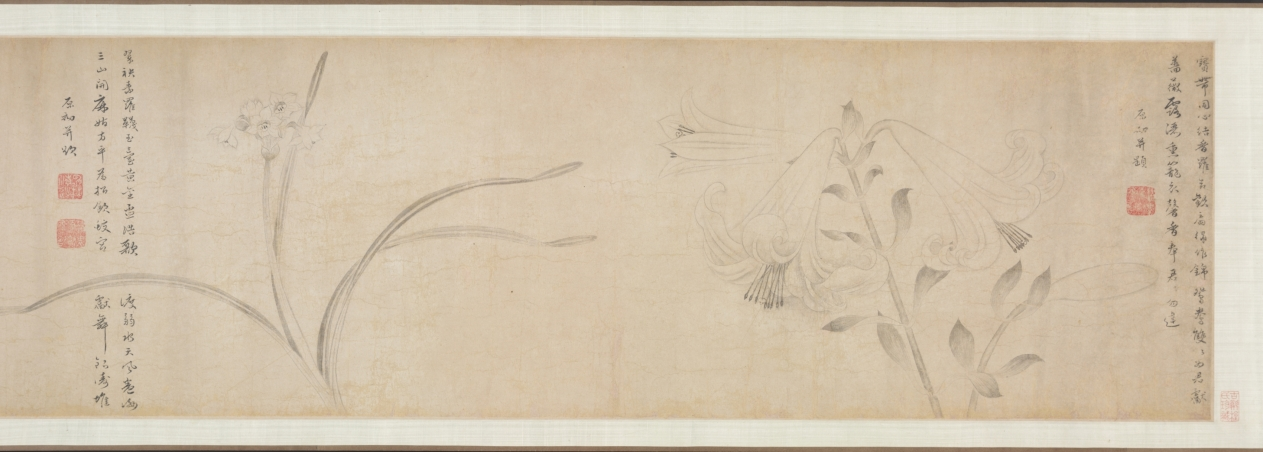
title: Ink Flowers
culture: China, Yuan dynasty (1271-1368)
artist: Zhao Zhong (Chinese, second half of the 1300s)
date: 1361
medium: Handscroll; ink on paper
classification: Painting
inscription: 寶帶同心結，香羅合歡扇。/ 繡作錦鴛鴦，雙雙為君獻。/ 薔薇露灑熏籠衣，馨香奉君君勿違。 原初并題。 [印] 趙衷原初畫記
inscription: 翠袂素羅韈，玉臺黃金盃。浩歌渡弱水。天風卷海三山開，麻姑方平為招飲，蛟宮獻舞銀濤堆。 原初并題。 [印] 雲林清趣、[印] 趙衷原初畫記。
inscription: 右用湯叔雅慶元中所寫墨花法作此卷，又效李長吉體賦詩以題之。詩與畫雖未工，要皆出於古人之餘，譬猶欲成方圓而必求其規矩之用也，識者毋誚焉！至正辛丑八月望日，東吳野人趙衷原初謹識。 [印] 趙原初、[印] 傳世清玩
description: Zhao Zhong's flowers, each paired with a poem, echo the fine-style colored flowers of the academic tradition, but instead he used only ink. Fine lines define the contours of each plant, as well as the veins within each petal and leaf. Careful ink washes give subtle modeling to the forms. The combination of lily, narcissus, and peony is unusual as the three belong to no known seasonal or symbolic system popular in the fourteenth century. Zhao’s medical training may have influenced the selection. Powdered lilies, for example, were prescribed to dispel grief, while the bark of tree peony roots was used as a treatment for various blood disorders.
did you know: This handscroll is a very rare example of ink flowers in the linear baimiao style of the fourteenth century.